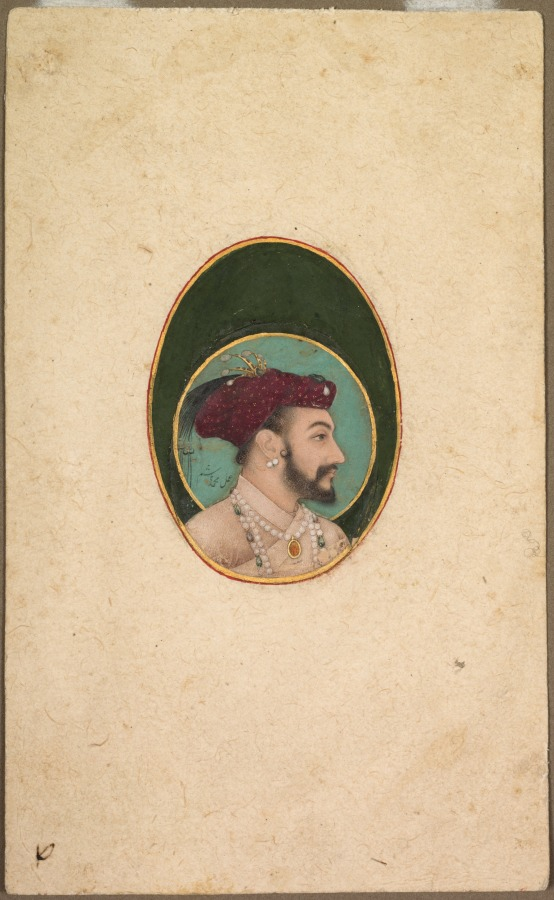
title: Shah Jahan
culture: India, Mughal Period (1526-1756)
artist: Hashim (Indian, active 1598-c.1650)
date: c. 1630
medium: Gum tempera, ink, and gold on paper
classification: Painting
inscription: signed: amal-i Muhammad Hashin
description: This sensitive portrait jewel was probably painted shortly after Shah Jahan came to the throne of the powerful Mughal Empire in 1628 after the death of his father, Jahangir. He decided to wear a full beard, in reference to his increased orthodoxy in comparison to his more liberal father and grandfather. The artist’s signature appears behind Shah Jahan’s nape.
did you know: This portrait belonged to Cleveland mogul Jeptha H. Wade II, a cofounder of CMA.